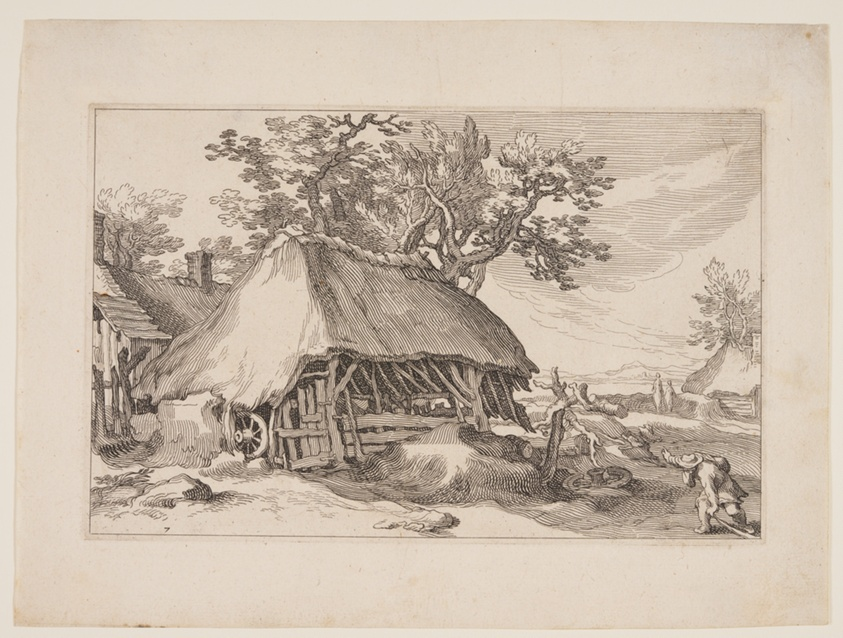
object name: Print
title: Plate 7, from Landscapes with Farmhouses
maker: Boëtius Adamsz. Bolswert (Flemish, 1580–1633); after Abraham Bloemaert (Dutch, 1566–1651)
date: 1614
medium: Etching on ivory laid paper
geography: Flanders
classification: print; paper; prints and drawing; etching